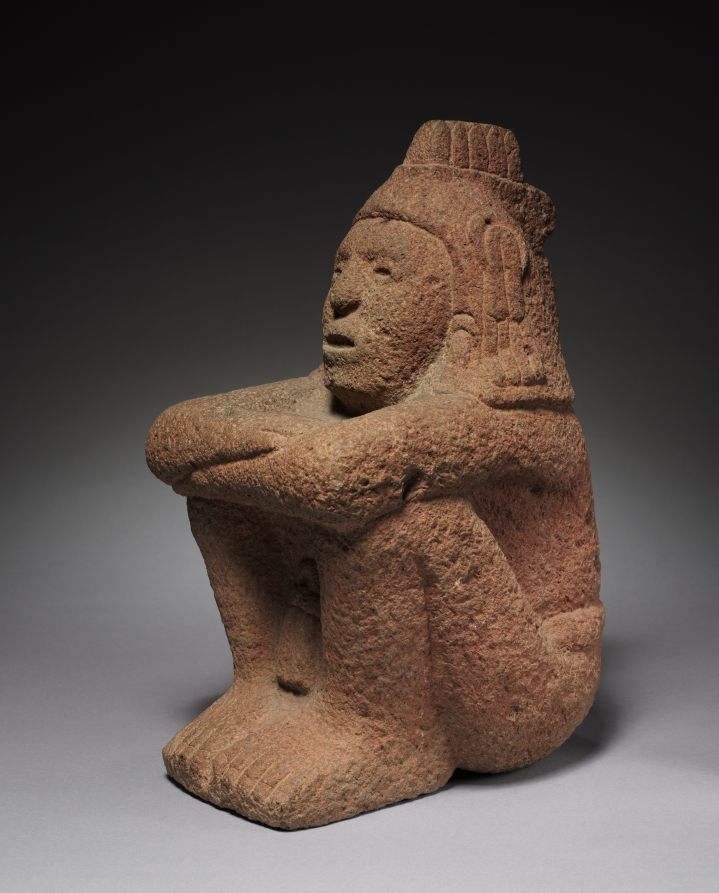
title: Seated Deity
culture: Mexico, Aztec, Valley of Mexico near Teotihuacan, Macuilxochitl (?), 14th-16th century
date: 1350–1519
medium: gray volcanic stone with red pigment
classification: Sculpture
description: The crested headdress with tassels suggests that this youthful, seated male is Macuilxochitl (Five Flower), an Aztec supernatural patron of many forms of pleasure, among them music, dance, feasting, games, and sex. His cult was popular among common people, and this effigy probably was created for use in a small neighborhood temple. The stone surface could have been plastered and then brightly painted.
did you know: The Aztecs associated the number 5 with excess: there were five gods of pleasure, one named “Five Flower.”